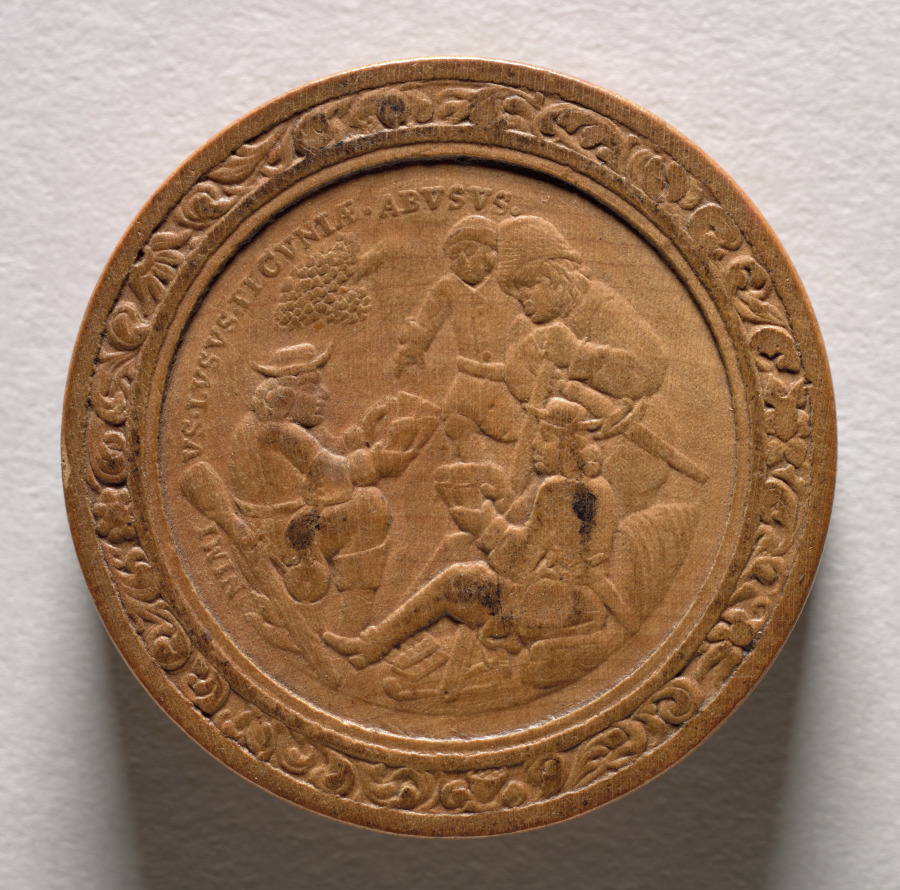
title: Gaming Piece (obverse)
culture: Germany, late 17th-early 18th Century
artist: Martin Brunner (German, 1659–1725)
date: c.1700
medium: wood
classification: Furniture and woodwork